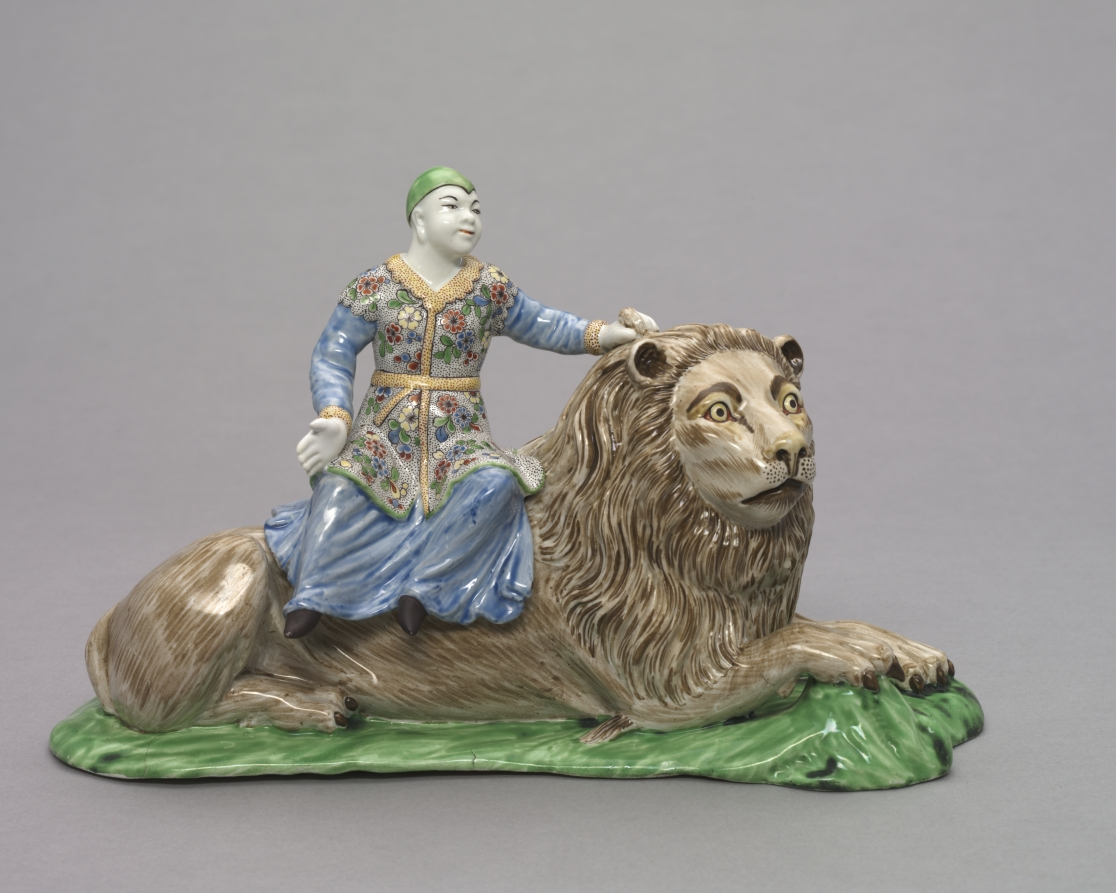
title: Figure Seated on a Lion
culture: France, 18th century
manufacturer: Chantilly Porcelain Factory (French)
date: c.1740–45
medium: Tin-glazed soft-paste porcelain with enamel decoration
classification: Ceramic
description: Exotic animals were highly coveted symbols of status and wealth. The practice of housing them in a centralized complex was popularized by French King Louis XIV’s menagerie at Versailles. This lion, along with other animal figurines produced at the factory, may have been modeled after living examples housed in the menagerie established by Louis Henri, duke of Bourbon, prince of Condé, and founder of the Chantilly porcelain factory.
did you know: The duke of Bourbon’s menagerie was recorded in the dedication to Jean-Antoine Fraisse’s Livre de Desseins Chinois (Book of Chinese Drawings), a book that documented the decoration on the duke’s collection of Asian porcelain, lacquer, and textiles.